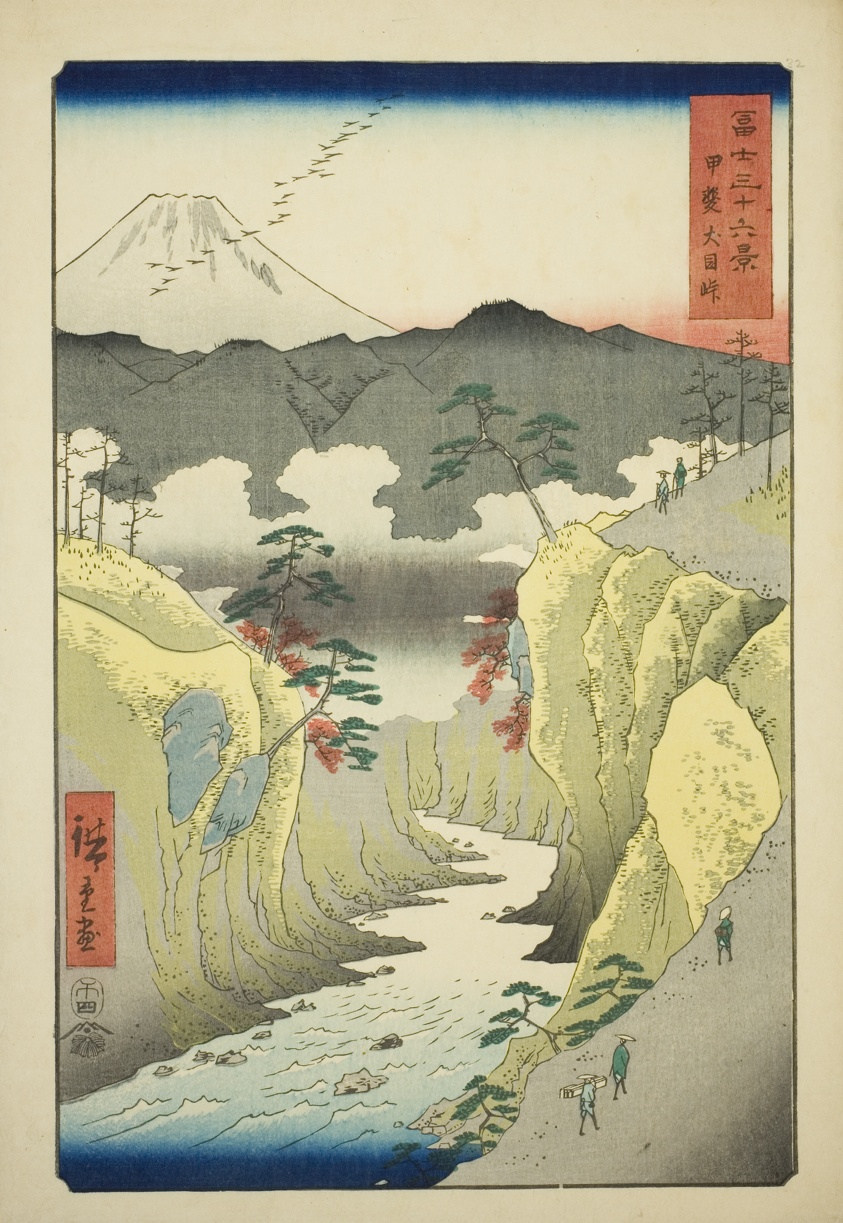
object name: Print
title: Inume Pass in Kai Province (Kai Inume toge), from the series "Thirty-six Views of Mount Fuji (Fuji sanjurokkei)"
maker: Utagawa Hiroshige 歌川 広重; Japanese, 1797-1858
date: 1858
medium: Color woodblock print; oban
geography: Japan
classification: woodblock print; print; asian art